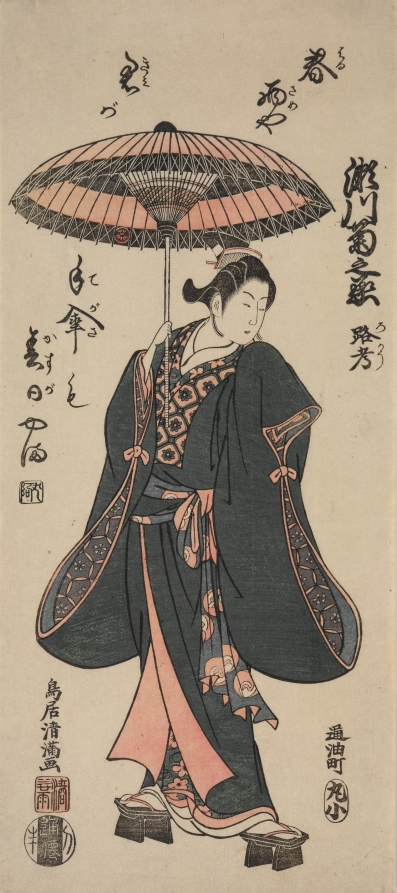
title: Segawa Kikunojo (Roko) Holding an Umbrella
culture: Japan, Edo period (1615–1868)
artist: Torii Kiyomitsu (Japanese, 1735–1785)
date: c. early 1760s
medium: color woodblock print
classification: Print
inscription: Signature: Torii Kiyomitsu ga Artist Seal: Kiyomitsu Publisher: Maruya Kohei (Toriaburacho, Maruko) Engraver: Tsusen kan (?)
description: The poem on the print can be translated as "in the spring shower shall I know his umbrella."